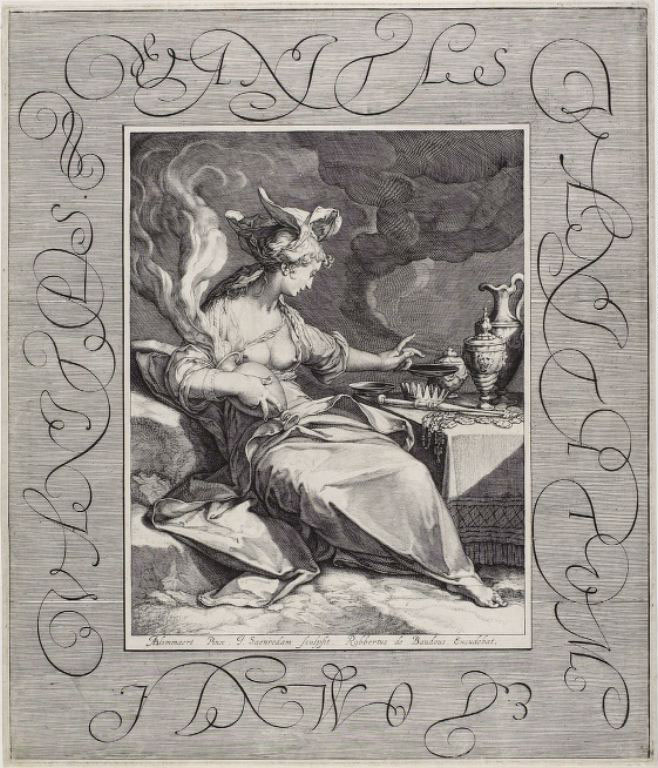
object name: Print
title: Vanity, Vanity, All is Vanity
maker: Jan Saenredam (Dutch, 1565-1607); after Abraham Bloemaert (Dutch, 1566-1651); published by Robert de Baudous (Flemish, c. 1575-c. 1656)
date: c. 1600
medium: Engraving on ivory laid paper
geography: Netherlands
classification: engraving; paper; print; prints and drawing